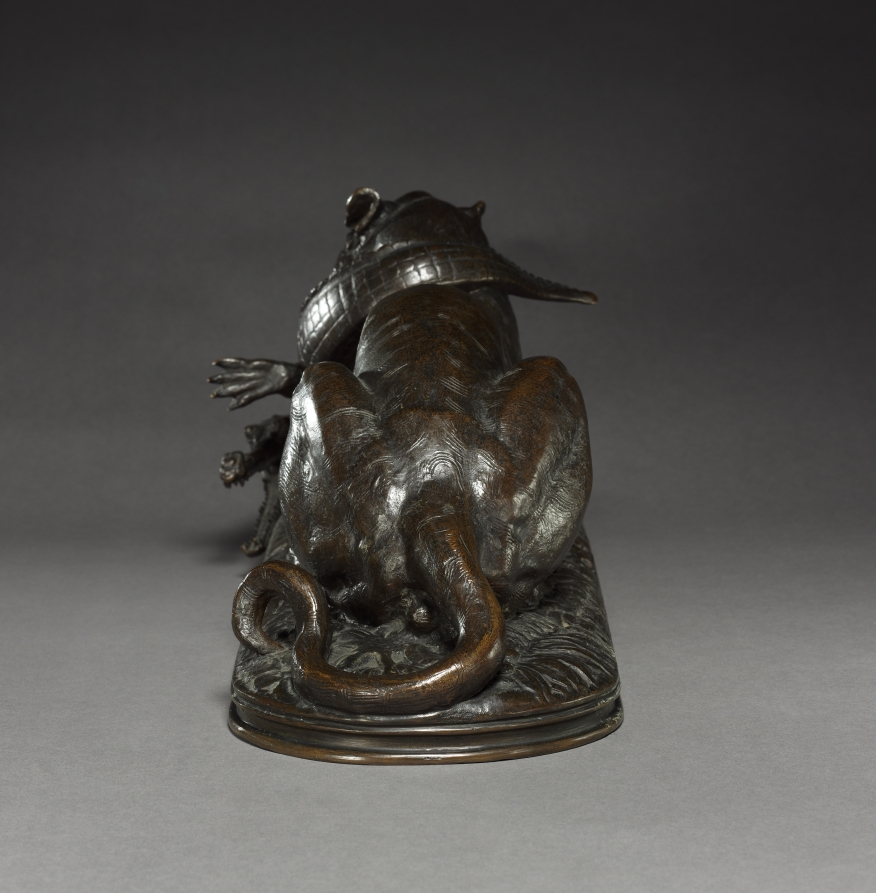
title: Tiger Devouring a Gavial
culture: France, 19th century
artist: Antoine-Louis Barye (French, 1796–1875)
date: 1831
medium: bronze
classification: Sculpture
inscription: Signed: "BARYE"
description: A large reptile of southern Asia, the gavial is related to and resembles a crocodile.